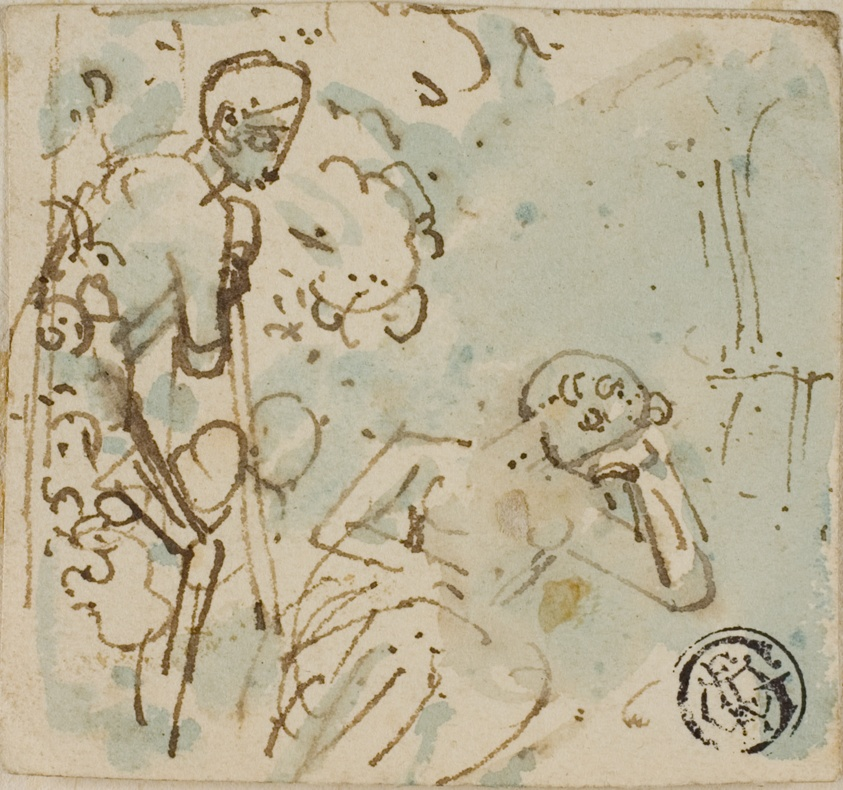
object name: Drawing and Watercolor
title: Sketch of Man Leaning on Staff, Looking at Sleeping Woman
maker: Attributed to Thomas Stothard; English, 1755-1834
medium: Pen and brown ink with brush and blue wash, on cream wove paper, tipped onto cream wove paper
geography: England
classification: pen and ink drawings; drawings (visual works); prints and drawing